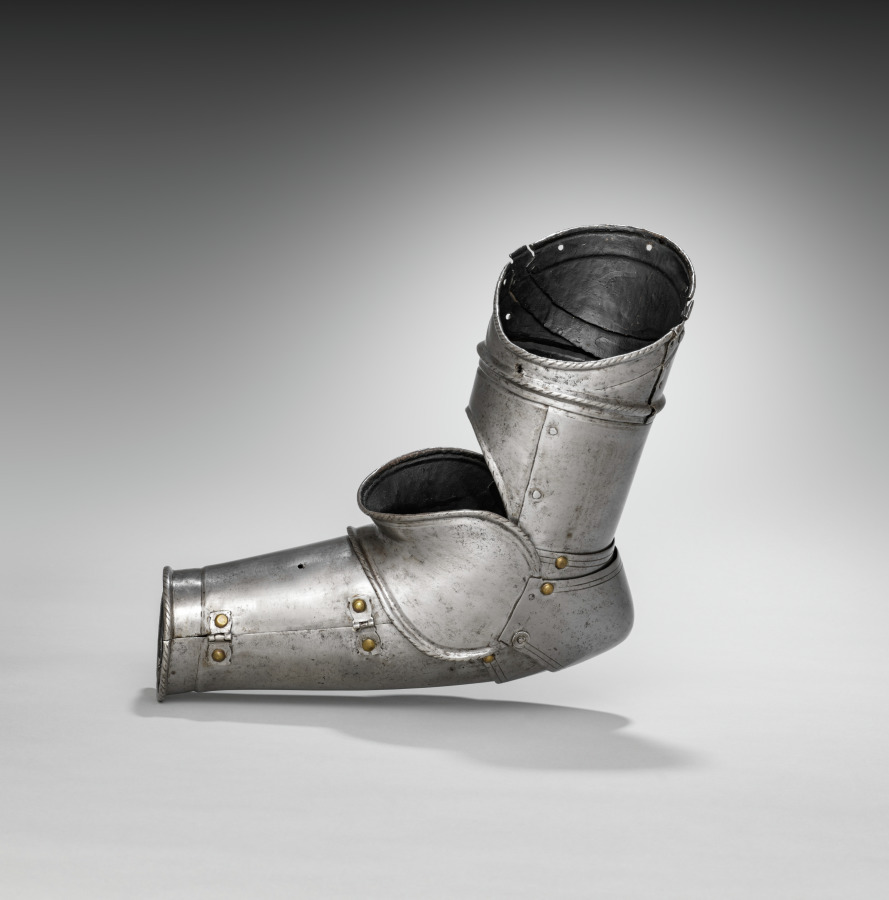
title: Proper Right Arm (Vambrace, Rerebrace and Couter)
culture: South Germany, 16th century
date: c. 1560–80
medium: steel, leather straps, brass rivets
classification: Arms and Armor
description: This armor was developed for the joust--a sporting combat between two mounted contestants. Although all of the elements of this armor date from the same period, they are not all from the same suit. This armor is thus called "composed." It also shows the asymmetry of jousting armor. The participants rode along a wall-like barrier known as a "tilt" with their left sides facing one another. Consequently, armor on that side of the body had to be thicker. Note the large plate (grandguard) over the left shoulder for extra protection. Also, the breathing holes in the helmet were placed on the right side (farthest from an opponent's lance) to avoid injuries from splinters. The bracket attached to the right breastplate is called the lance-rest, a shock-absorbing support designed to accommodate the lance when "couched" under the right armpit.